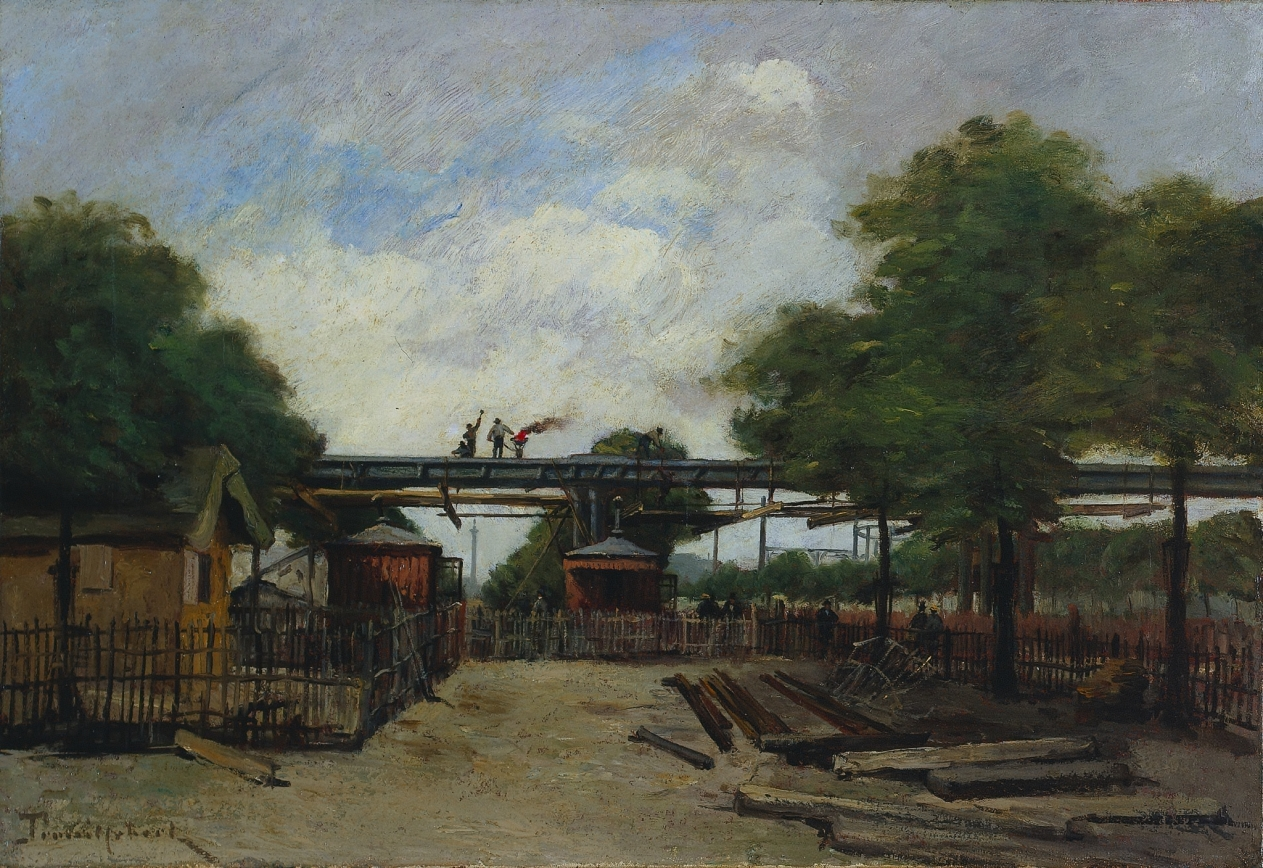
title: Construction of an Elevated Railway: Bridge over the Cours de Vincennes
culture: France, 19th century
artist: Paul Désiré Trouillebert (French, 1829–1900)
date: 1888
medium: oil on fabric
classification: Painting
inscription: Signed lower left: Trouillebert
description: Conceived in 1851, after Napoleon III came to power, the railway encircling Paris was intended to transport merchandise and, eventually, passengers. The railway represented a new convenience, but measures were needed to ensure the safety of other traffic. The numerous railway crossings included in the initial plans turned out to be a source of fatal accidents. To remedy the problem, the platforms and retaining walls were to be raised at the most dangerous spots. The Cours de Vincennes, in the eastern part of Paris, had been one of the deadliest intersections. The work on an elevated railway bridge over this street, which is depicted here, was completed in February 1889. Trouillebert concentrated on portraits until about 1881, when he began to focus on landscapes. He also painted everyday scenes and nudes. He was commissioned by Edme Piot, a public works contractor, to paint this and four related views of the Paris railway construction.